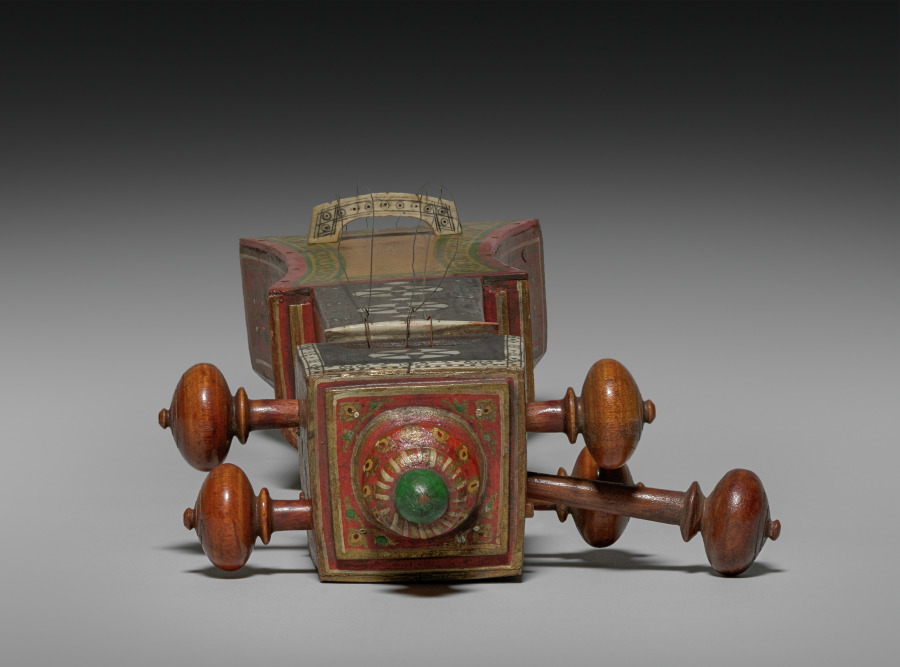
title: Sarangi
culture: India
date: 1800s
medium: Gum tempera and gold on wood with mother-of-pearl and bone or ivory inlays; metal strings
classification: Musical Instrument